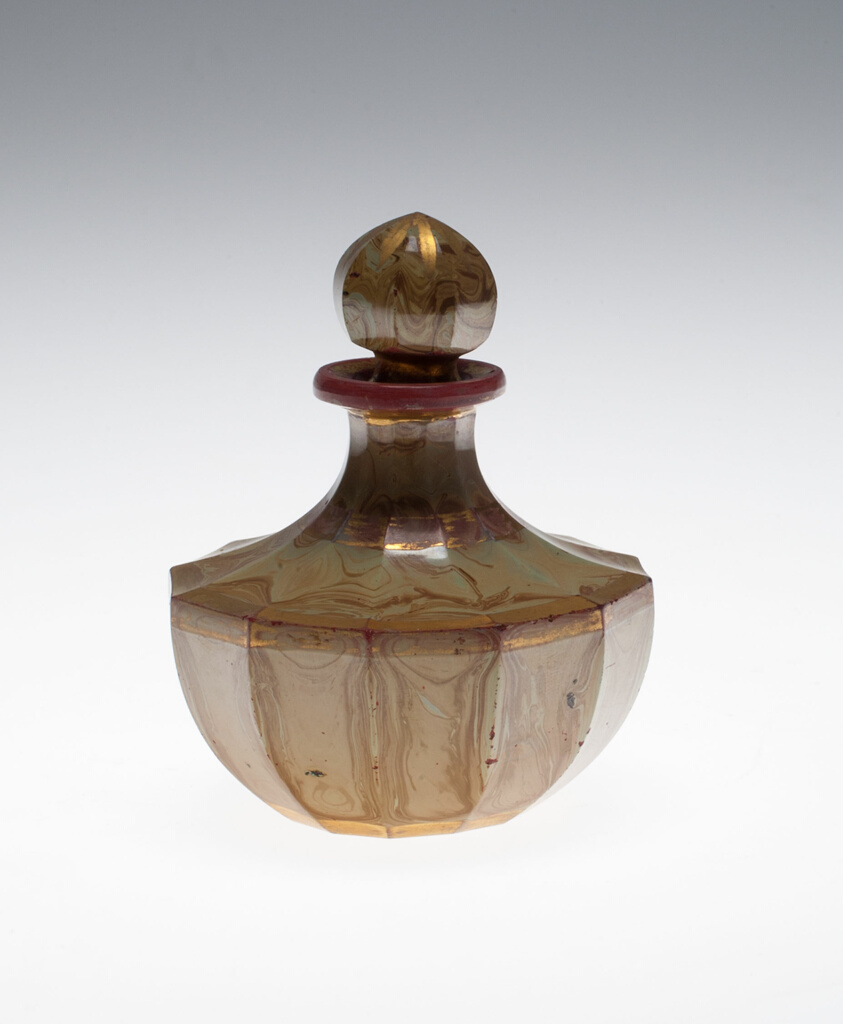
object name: Glass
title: Lithyalin Scent Bottle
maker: Workshop of Friedrich Egerman; Bohemian, 1777-1864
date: c. 1830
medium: Glass; marbled opaque red and ochre, blown, cut, stained and gilded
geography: Bohemia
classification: glass; european decorative arts